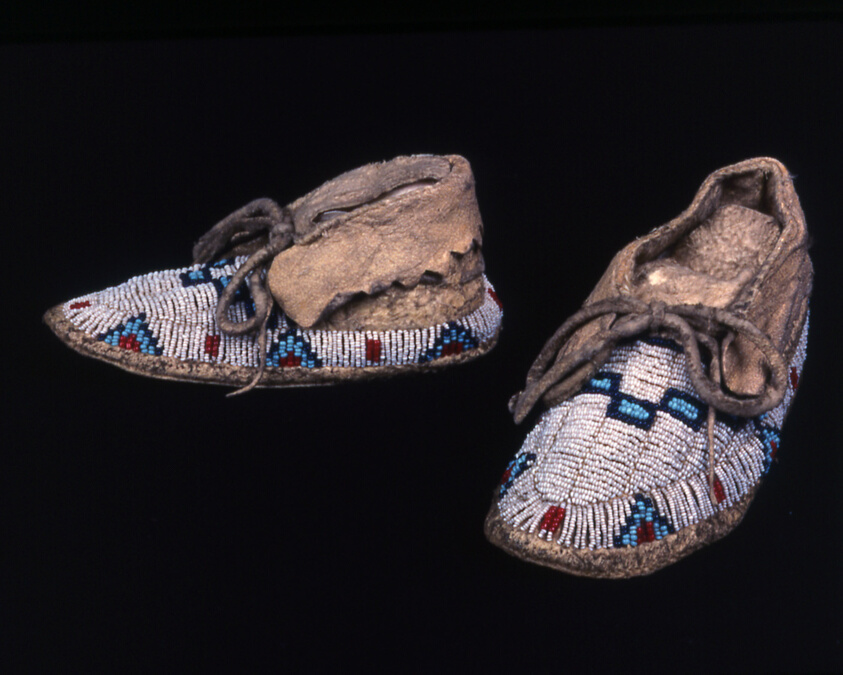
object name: Textile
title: Pair of Child's Mocassins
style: sioux, plains indian, native american, americas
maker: Possibly Sioux; Plains, North America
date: c. 1885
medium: Buffalo rawhide, sewn with sinew; decorated with beads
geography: Plains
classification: textile; shoes - needlework; costume accessory - shoe; costume accessory; costume; dress (garment); clothing